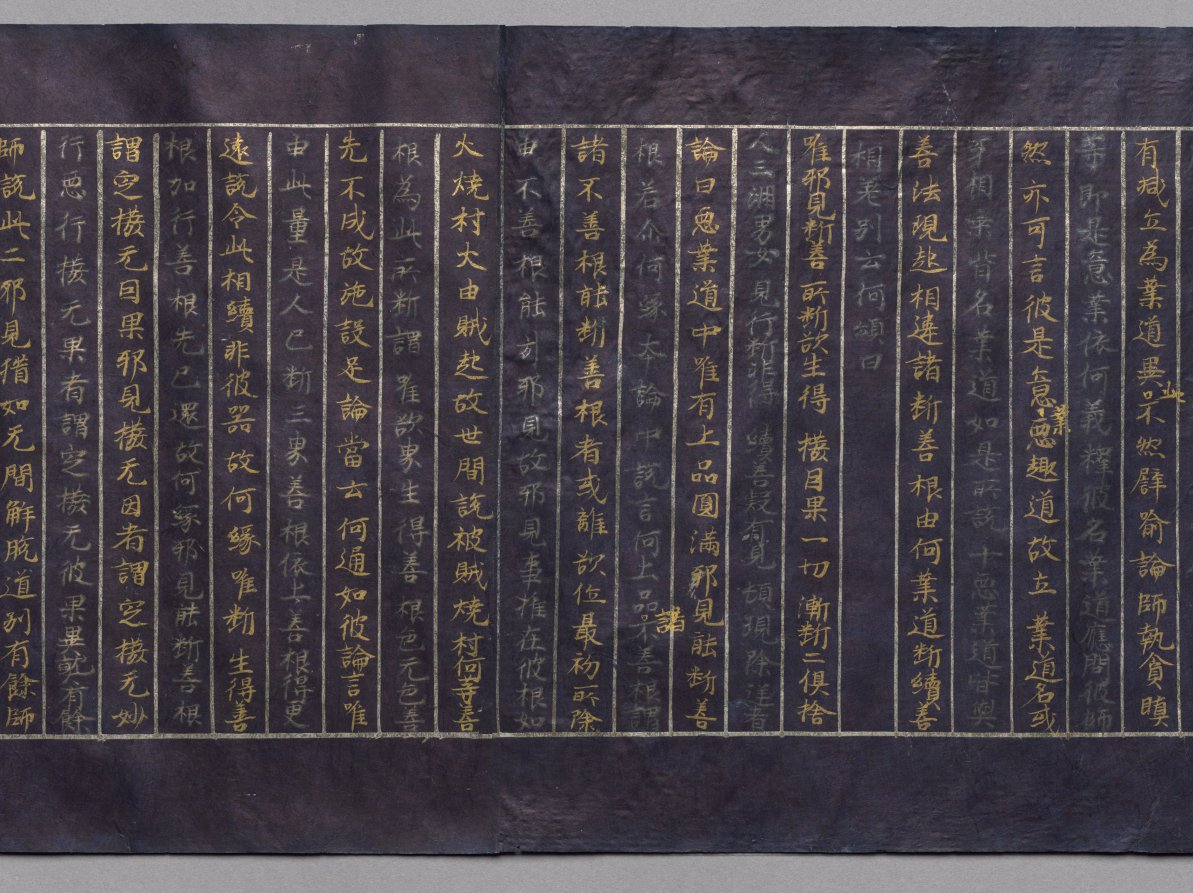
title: Meta-Discourse on the Teachings from the Treasury (Abidharmakosha-Bhashya)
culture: Japan, Heian period (794–1185)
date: 1100s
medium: handscroll; gold and silver on indigo-dyed paper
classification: Manuscript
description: This religious text relates some of the teachings of the great fourth-century Indian Buddhist scholar Vasubhandhu. The text analyzes human consciousness in its relationship to the environment and transformations that occur during meditation. This scroll is the 17th part of a 30-part translation of the text by Xuanzang, an eminent seventh-century Chinese monk.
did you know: The frontispiece depicts the Buddha Shakyamuni preaching in a paradisical landscape.